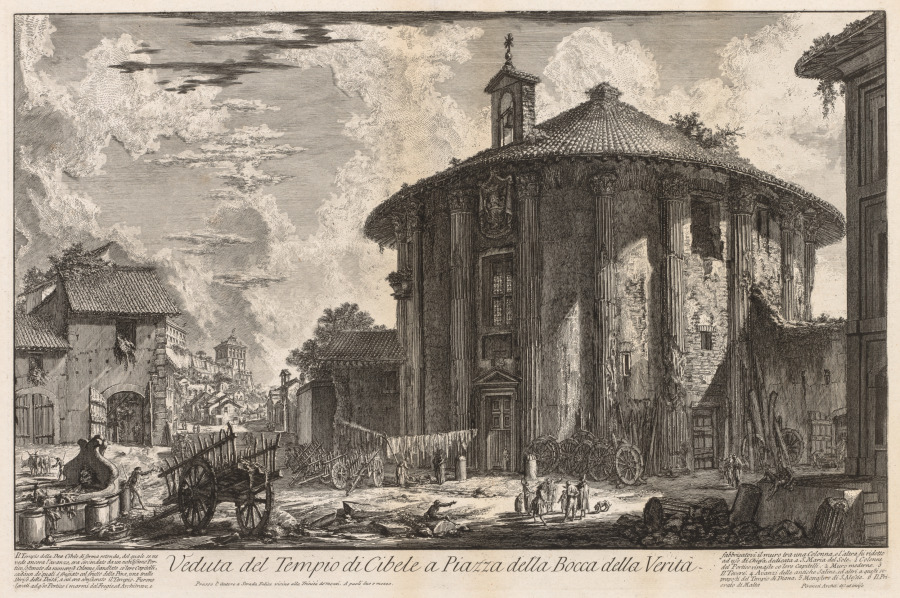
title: Views of Rome: Temple of Cybele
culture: Italy, 18th century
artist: Giovanni Battista Piranesi (Italian, 1720–1778)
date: 1758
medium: etching and engraving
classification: Print